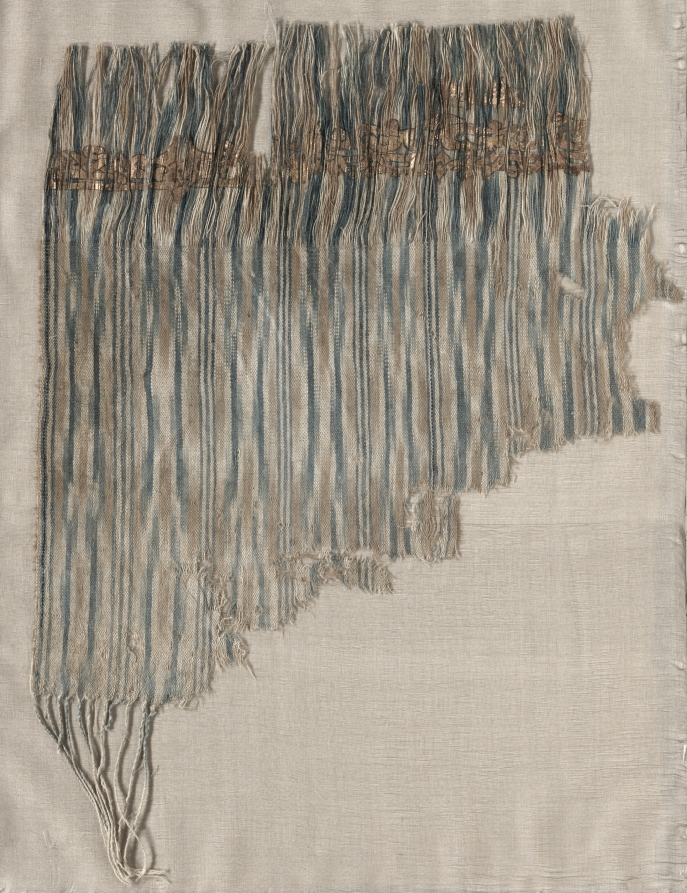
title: Ikat tiraz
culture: Yemen, San'a, Reign of Rassid Imams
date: 900s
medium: Cotton and gold leaf: resist-dyed warp (ikat); plain weave with inscription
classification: Textile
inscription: an elaborate Kufic inscription is painted; it has many braided letters and is so damaged that it cannot be read.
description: The "flame" pattern was dyed on the vertical warp threads before weaving began by tightly binding them to resist dye penetration, and repeated for each color. The process and fabric are called ikat, a Malaysian word which may have originated in South Arabia. Yemeni ikats with historical Arabic inscriptions from the 10th century are among the oldest known. This text, written in Kufic script with gold leaf outlined in black, is so damaged that it cannot be read.